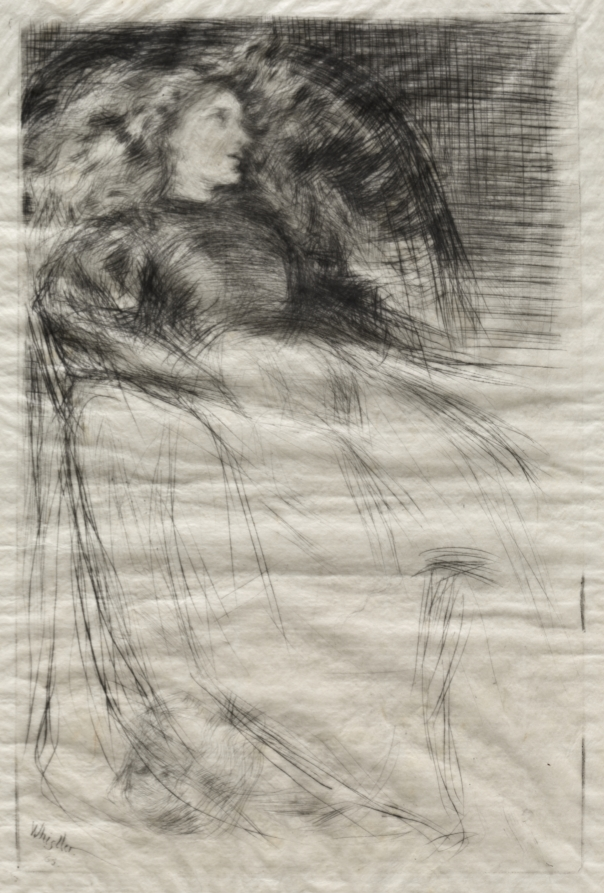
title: Weary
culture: America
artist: James McNeill Whistler (American, 1834–1903)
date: 1863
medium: drypoint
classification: Print